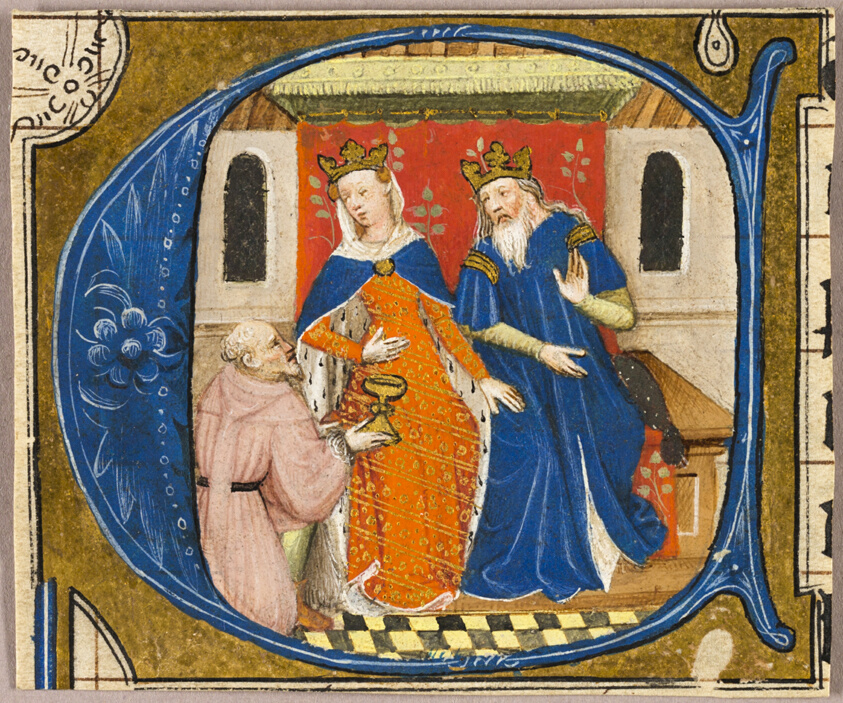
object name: Drawing and Watercolor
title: Nehemiah before King Artaxerxes, initial ‘C’ from a Bible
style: medieval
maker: Masters of Zweder van Culemborg; Northern Netherlandish (Utrecht), about 1415-1440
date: about 1430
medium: Opaque watercolor, gold leaf, mordant gilding, and pen and black ink, with touches of pen and brown ink (recto), and pen and black ink, with touches of red opaque watercolor and pen and brown ink (verso), on parchment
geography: Netherlands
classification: watercolor; manuscript; prints and drawing